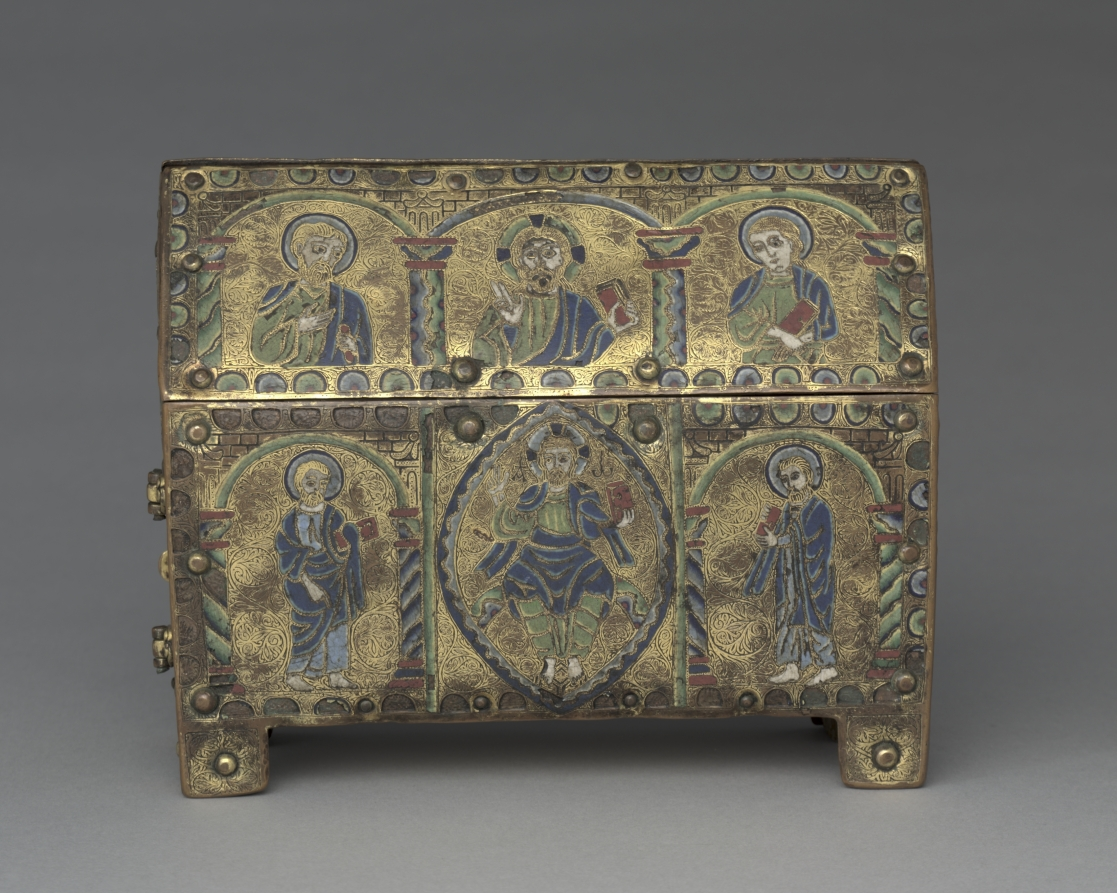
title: Chasse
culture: France, Limousin, Limoges, Gothic period, first half of 13th century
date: 1200–1250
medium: copper: gilded, engraved, chased; champlevé enamel; wood core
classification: Enamel